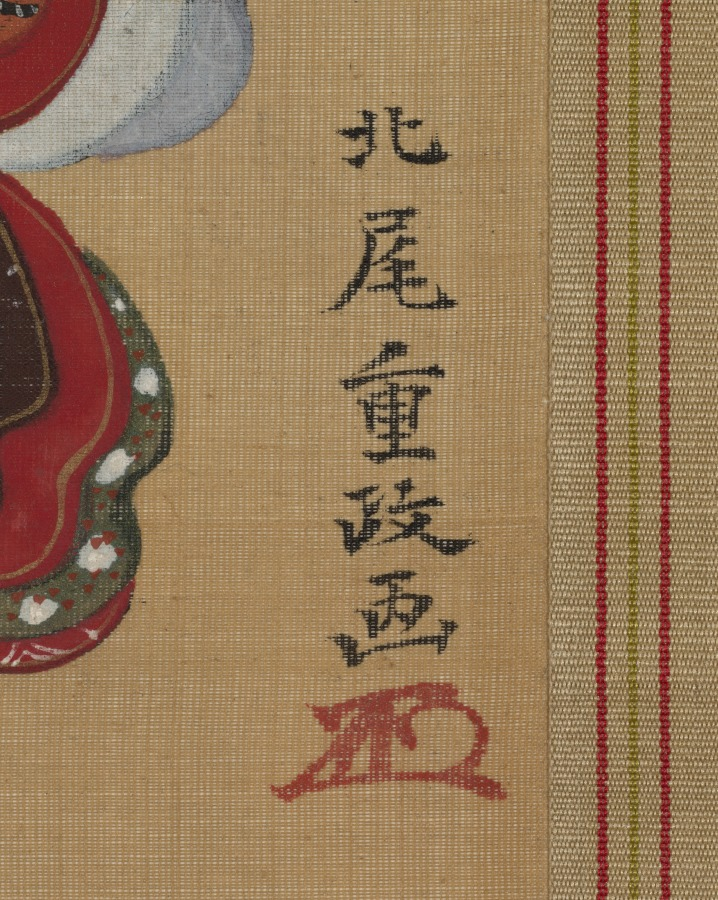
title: Two Beauties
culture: Japan, Edo period (1615–1868)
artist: Kitao Shigemasa (Japanese, 1739–1819)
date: late 1700s–early 1800s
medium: hanging scroll, pillar painting: ink and color on silk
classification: Painting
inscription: Artist's signature and seal, lower right corner. Poem inscribed on upper section of scroll.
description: Shigemasa favored using colors in broad opaque masses, as seen here in the beauties’ robes. He was a painter, printmaker, and poet, specializing in courtesan and actor prints. The format of this hanging scroll or "pillar painting" allows for the work to be hung on a pillar in a Japanese home.